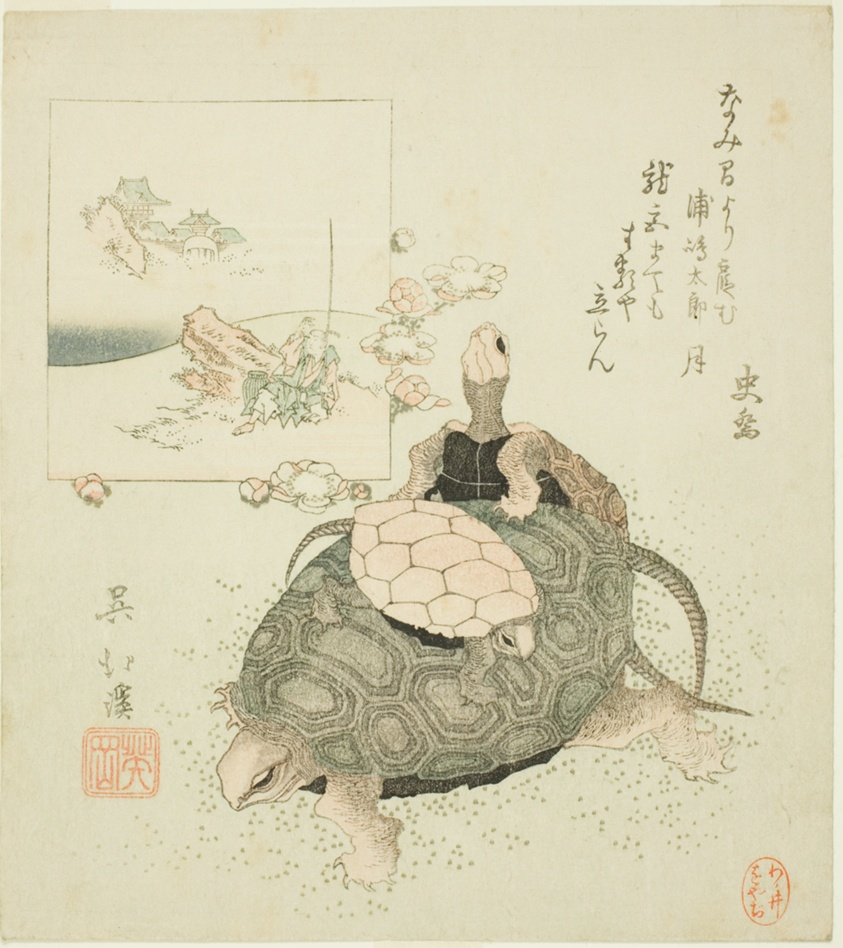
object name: Print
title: Sea turtles and Urashima Taro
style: Japanese (culture or style)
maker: Totoya Hokkei (Japanese, 1780–1850)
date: c. 1825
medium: Color woodblock print; shikishiban, surimono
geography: Japan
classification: woodblock print; print; asian art